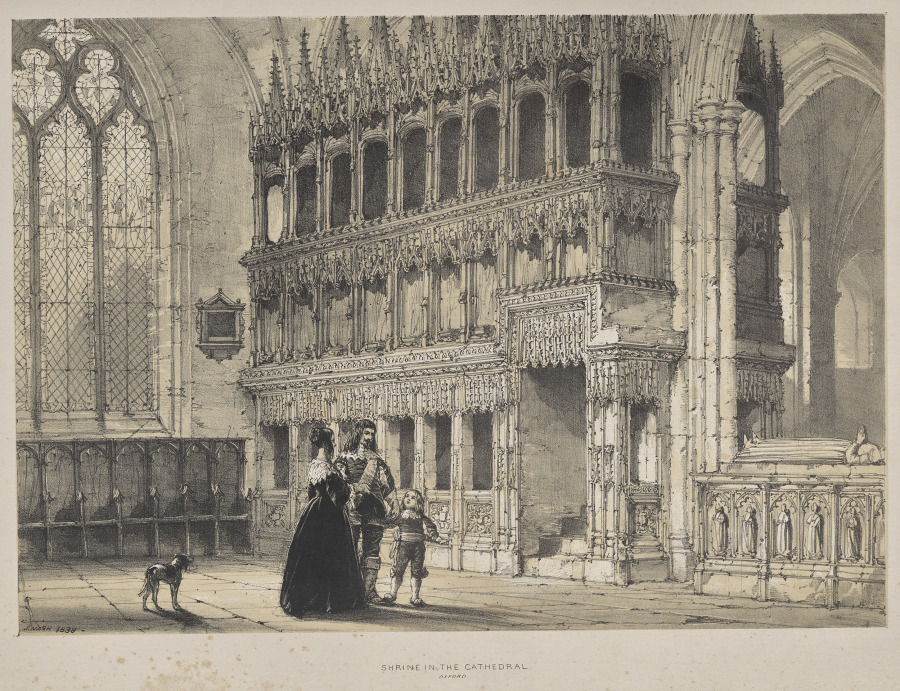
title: Architecture of the Middle Ages: Shrine of St. Fridswode, Cathedral, Oxford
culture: England, 19th century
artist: Joseph Nash (British, 1808–1878)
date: 1838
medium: lithograph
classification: Print